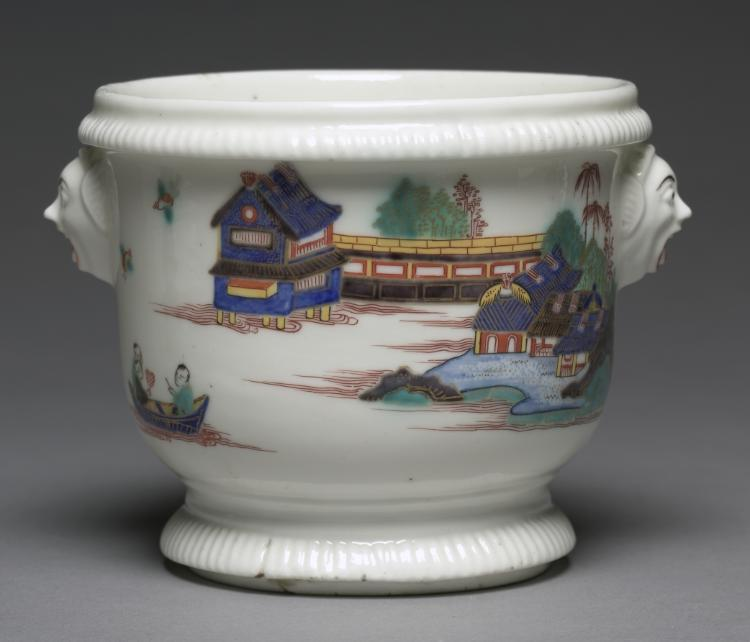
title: Bottle Cooler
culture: France, Saint Cloud, 18th century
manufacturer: Saint Cloud Porcelain Factory (French)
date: c. 1725– 1735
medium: soft-paste porcelain with enamel decoration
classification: Ceramic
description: The form of these cachepots is entirely typical of Saint-Cloud porcelain of about 1725. Their decoration, based upon Chinese porcelains of the so-called "famille-verte" type, is most unusual. Polychromed enamels were not often employed on Saint-Cloud porcelains, and figural scenes are very rare.